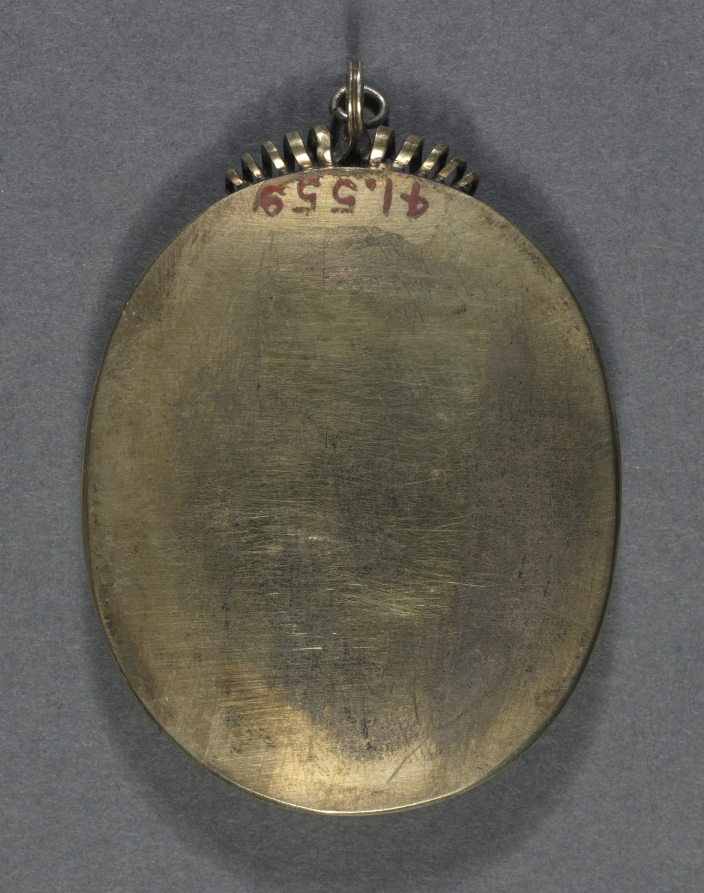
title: Portrait of Lucy Russell, Countess of Bedford, née Harrington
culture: England, early 17th century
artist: Isaac Oliver (French, c. 1565–1617)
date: c. 1608–1616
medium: watercolor on vellum with gold and silver in a 17th-century silver gilt frame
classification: Portrait Miniature